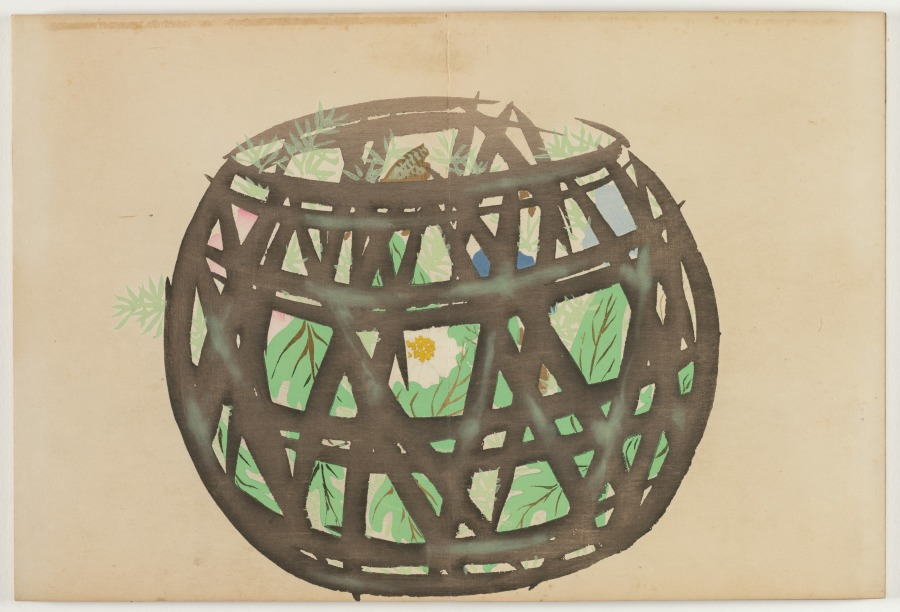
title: Flowers of a Hundred Worlds (Momoyogusa): Flower Basket (Hanakago)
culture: Japan, Meiji period (1868–1912)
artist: Kamisaka Sekka (Japanese, 1866–1942)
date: 1909–10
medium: color woodcuts with gold and silver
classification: Bound Volume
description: This print from a set of three woodblock printed albums displays the graphic design prowess of Kamisaka Sekka. The images were first distributed one by one to subscribers to the series but later were reissued in bound form, like this book, for mass consumers. Each print features a vignette taken from nature or Japanese literature. Many of the scenes have a long history in Japan, originating in the 900s or 1000s and having been interpreted by all manner of artists since that time. Sekka’s selections hew closely to precedents from the Rinpa style originated by painter Tawaraya Sōtatsu (c. 1570–c. 1640) and calligrapher Hon’ami Kōetsu (1558–1637).